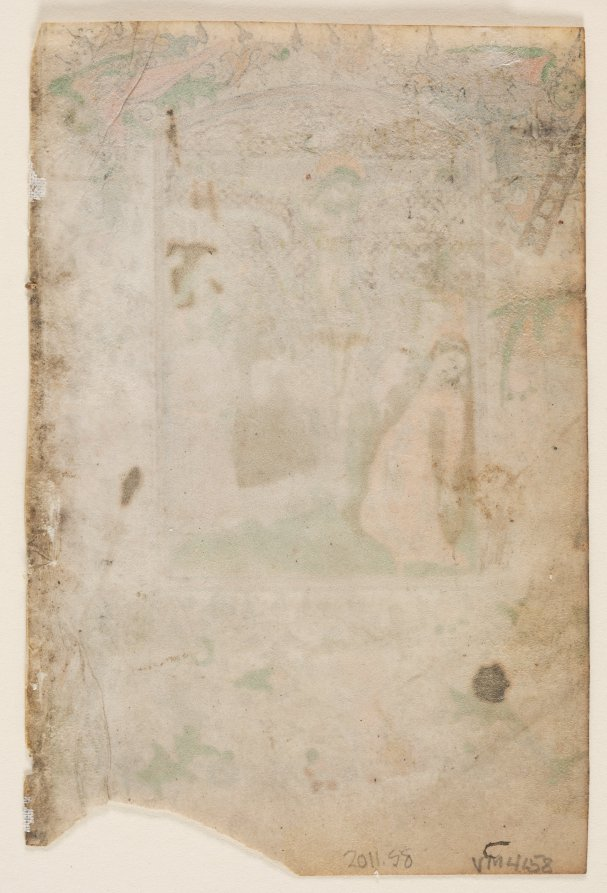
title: Leaf from a Book of Hours: The Crucifixion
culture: Flanders, Ghent?, 15th century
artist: Master of Guillebert de Mets (Flemish)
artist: and Workshop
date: 1430s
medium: ink, tempera and gold on vellum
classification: Manuscript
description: The Master of Guillebert de Mets is named after the scribe who records his name in an illuminated copy of the Decameron, made for Duke Philip the Good of Burgundy, and for which he contributed many of its miniatures. He was active from about 1410 to 1445. So far there is no proof that allows us to follow his career or to know precisely where he worked. Calendars in other manuscripts with which he is associated suggest his shop may have been in Tournai, Liège, Bruges, and more credibly, Ghent. His commissions may have been linked to the itinerant Burgundian court, though no original provenance survives for any of his manuscripts. The Master of Guillebert de Mets painted in an easily recognizable style. His figures have prominent heads with well-delineated eyes and small mouths, slender torsos with thin, spindly legs, and long, finely worked fingers. Many of his miniatures, such as The Crucifixion and The Last Judgment here, show that he often favored mosaic backgrounds of delicately worked checkered patterns.